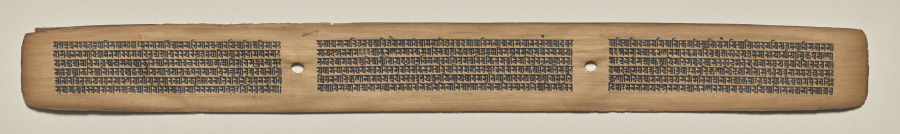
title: Text, Folio 137 (recto), from a Manuscript of the Perfection of Wisdom in Eight Thousand Lines (Ashtasahasrika Prajnaparamita-sutra)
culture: Eastern India, Bihar, Vikramashila Monastery. Painting: Nepal, Kathmandu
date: Sunday, September 14, 1119 (year 239 of the Newar Samvat in the month of Ashvina)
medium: gum tempera and ink on palm leaves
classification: Painting